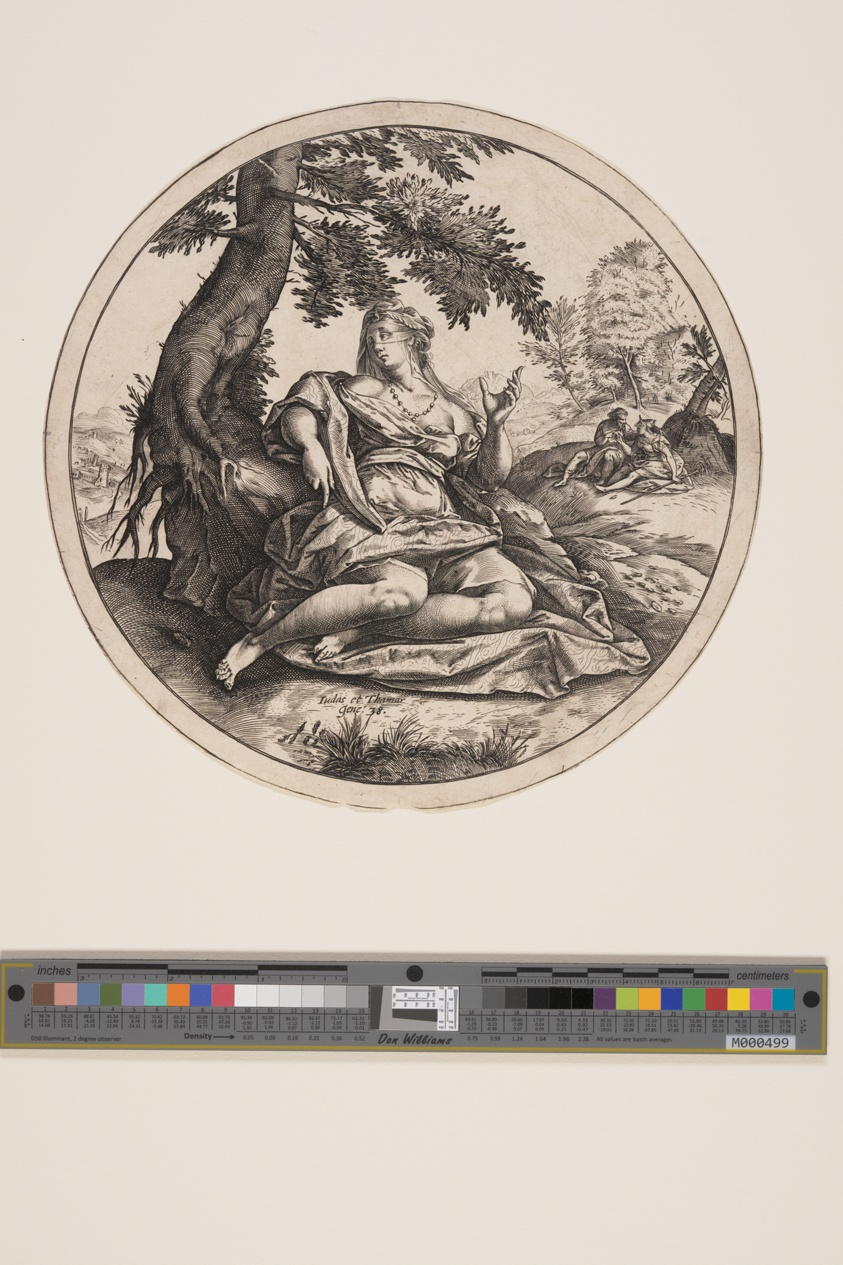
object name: Print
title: Judah and Thamar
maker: After Hendrick Goltzius; Dutch, 1558–1617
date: c. 1600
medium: Engraving on laid paper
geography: Netherlands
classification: engraving; paper; print; prints and drawing